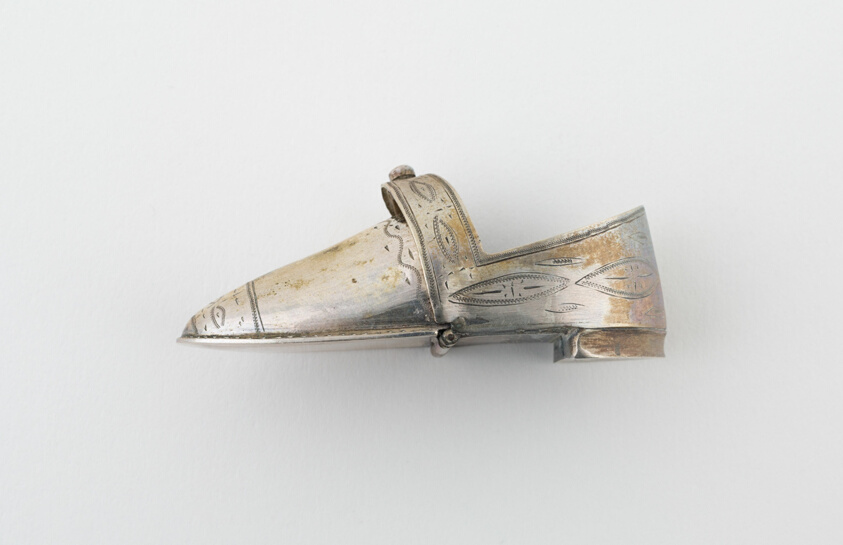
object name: Metalwork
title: Vinaigrette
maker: Netherlands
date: mid 19th century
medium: Silver-plated brass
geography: Netherlands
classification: vinaigrette (container for health care); container for personal use; box; european decorative arts; metalwork; silver; decorative object/ornament